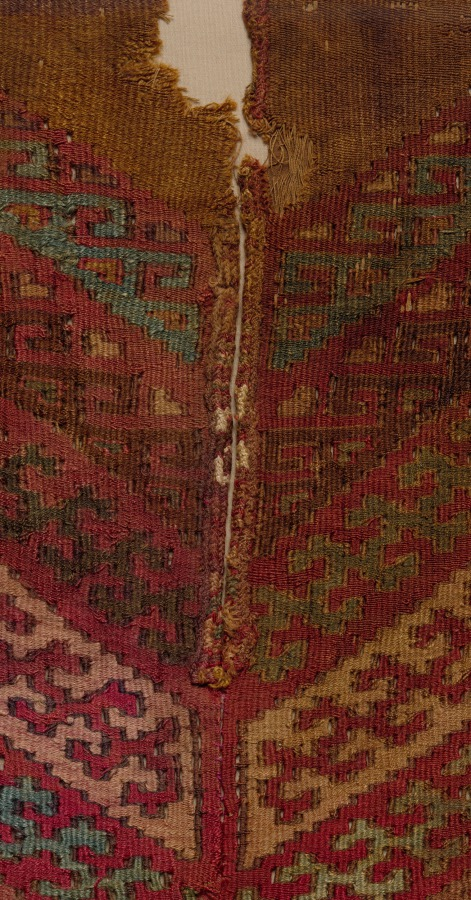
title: Tapestry-woven Yoke from a Tunic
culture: Central Andes, North Central Coast, Moche-Wari Style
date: 800–1200?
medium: camelid fiber and cotton, tapestry weave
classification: Textile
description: This fragment comes from the upper area of a tunic, with thick embroidery defining remnants of the neck opening. In the rectangular area on the chest are two similar long-tailed creatures rendered in a highly geometric style. Each is rotated 90 degrees, so their tails are parallel to the bottom edge. The cloven hooves on their upper legs may identify the creatures as deer or Andean camelids, such as llamas or alpacas.